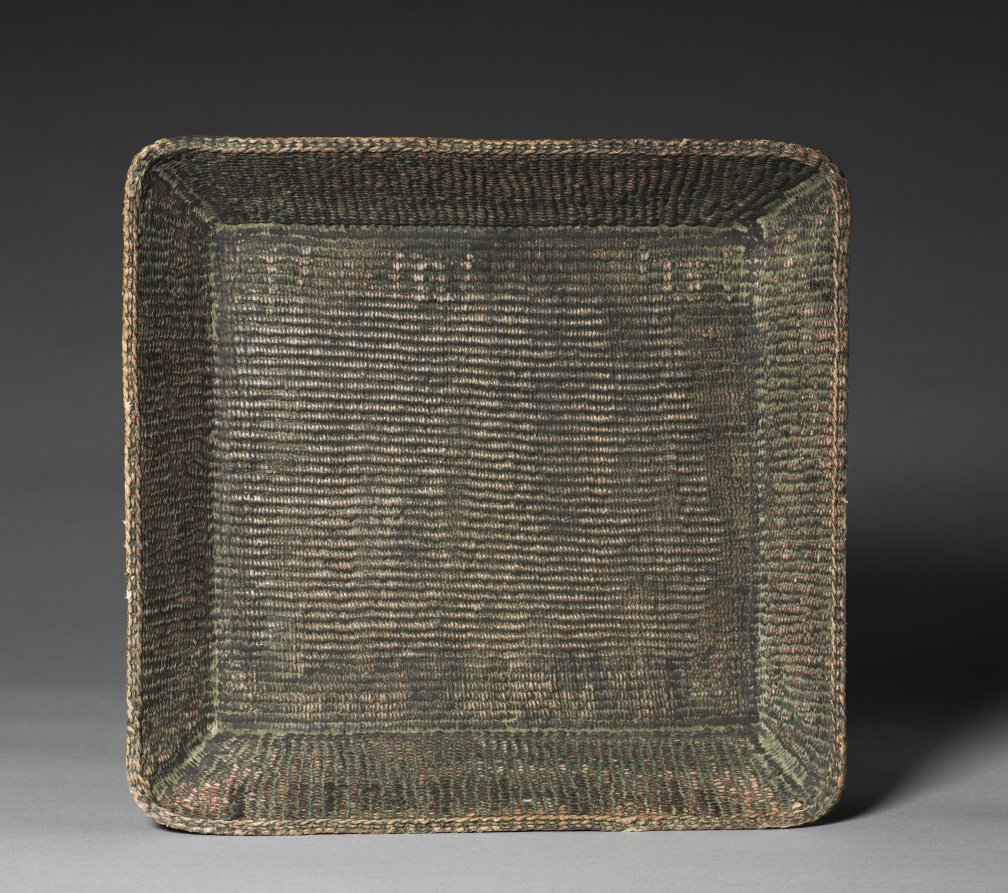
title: Footed Tray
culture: Korea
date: 1900s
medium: lacquer over twisted and coiled paper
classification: Lacquer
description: In Korea, paper has been widely used since the 1800s for constructing stationery and storage boxes, as well as for paraphernalia for the scholar's studio. This tray's modest appearance belies both the laborious process involved in its construction and its status in Korea as an object for the scholar's desk.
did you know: The artist first cords and twines paper before constructing a desired shape.